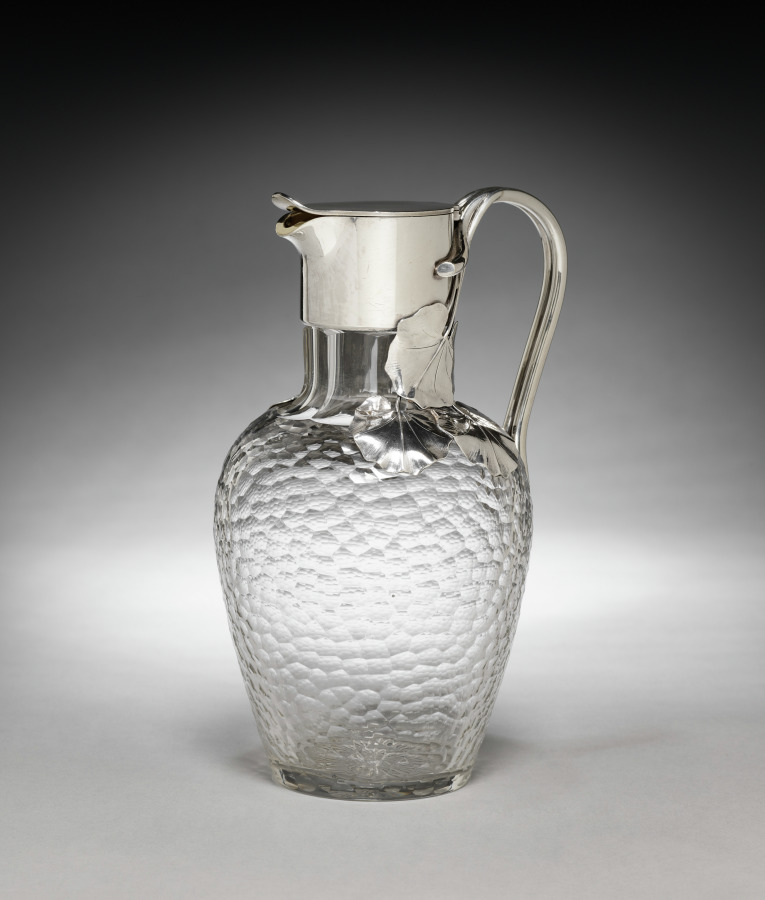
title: Jug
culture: Russian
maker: House of Fabergé (Russian, 1842–1918)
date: 1895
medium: silver, cut glass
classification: Glass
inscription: "K. Faberge" in Cyrillic, surmounted by the double-headed Imperial eagle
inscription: "88" silver standard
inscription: St. Peterburg coat of arms (St. George and the dragon)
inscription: Cyrillic initials "AC"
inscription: "1895"